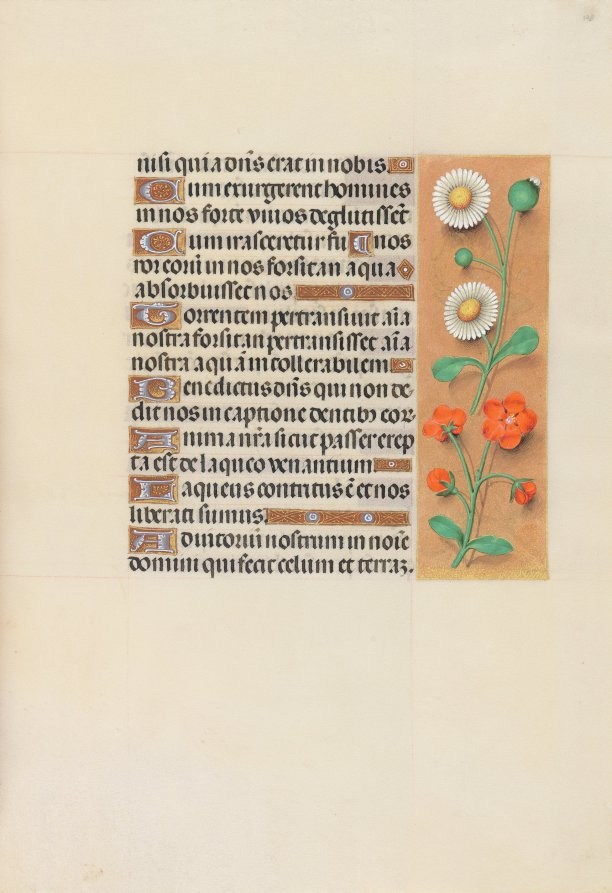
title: Hours of Queen Isabella the Catholic, Queen of Spain: Fol. 138r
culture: Flanders, Ghent and Bruges, late 15th century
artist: Master of the First Prayerbook of Maximillian (Flemish, c. 1444–1519)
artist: and Associates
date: c. 1500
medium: ink, tempera, and gold on vellum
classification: Bound Volume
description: This manuscript was illuminated by a circle of at least five highly organized manuscript painters active in the Flemish cities of Ghent and Bruges. The principal illuminator was Alexander Bening, who painted the majority of the book's miniatures. Manuscripts produced by this circle of artists are renowned for the decoration of their borders, which typically feature a rich variety of realistically-painted flowers, birds, and butterflies. This prayer book, called a book of hours, was intended not for a cleric, but for the private devotions of a lay person-in this case, Isabella the Catholic, Queen of Spain (1451-1504). Isabella's coat of arms embellishes the book's frontispiece. It is unlikely that the book was commissioned by the Queen herself; rather, she probably received it as a diplomatic gift from someone courting her patronage, perhaps Cardinal Francisco Jimenez de Cisneros. A Franciscan friar, Jimenez was dependent upon Isabella for his advancement, first to the post of Queen's confessor in 1492, and then to Archbishop of Toledo in 1495.